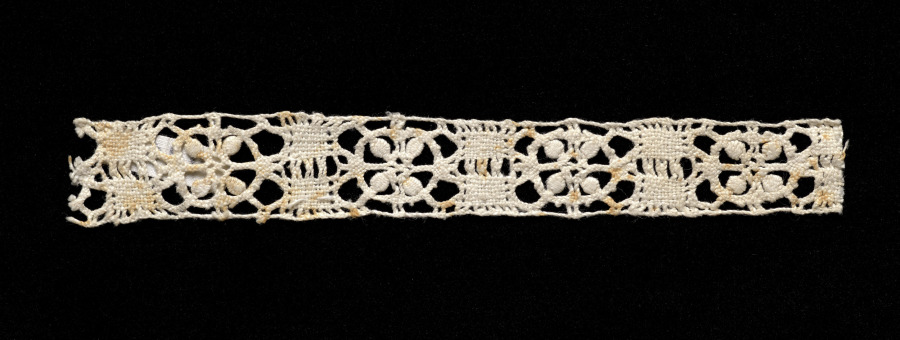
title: Lace Insertion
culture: Italy, Abruzzi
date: 1700s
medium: Bobbin lace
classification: Lace